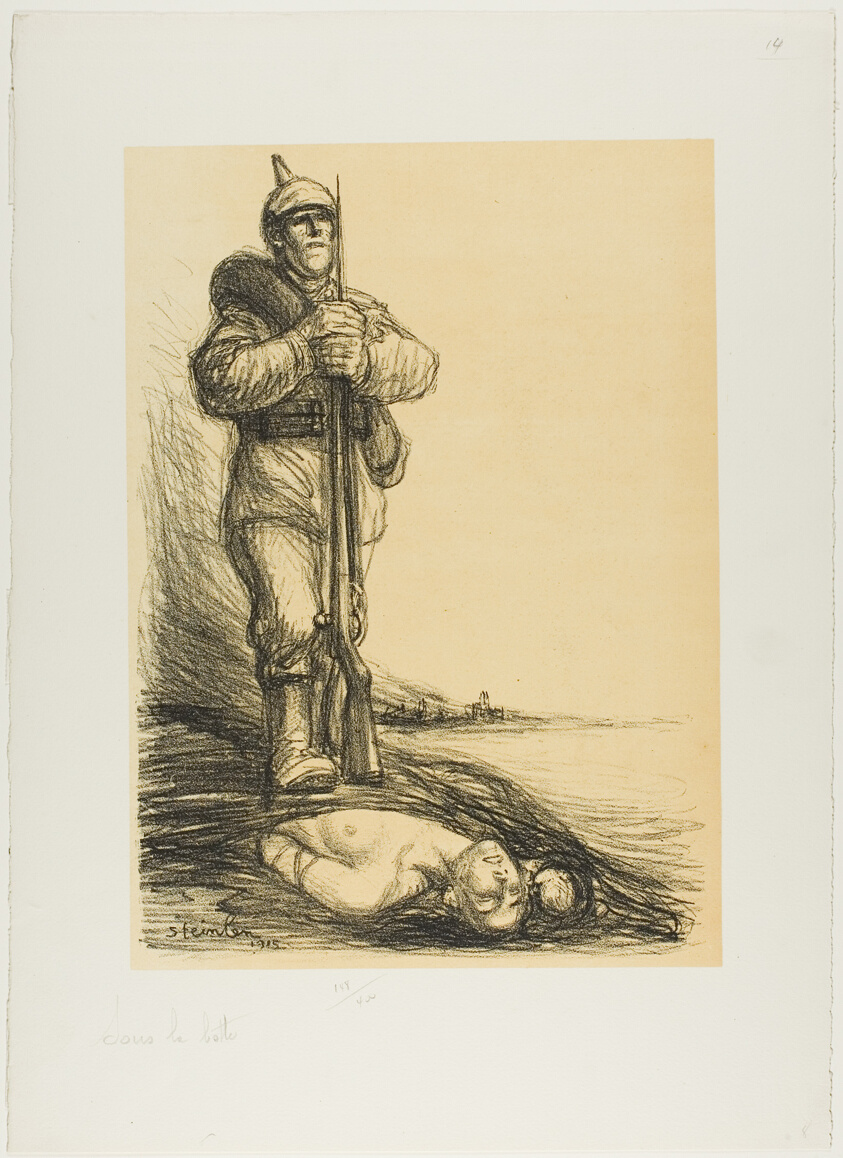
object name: Print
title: Under the Boot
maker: Théophile-Alexandre Steinlen; French, born Switzerland, 1859-1923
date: 1915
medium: Lithograph in black over a fawn tint on thick off-white wove paper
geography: France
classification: lithograph; print; prints and drawing